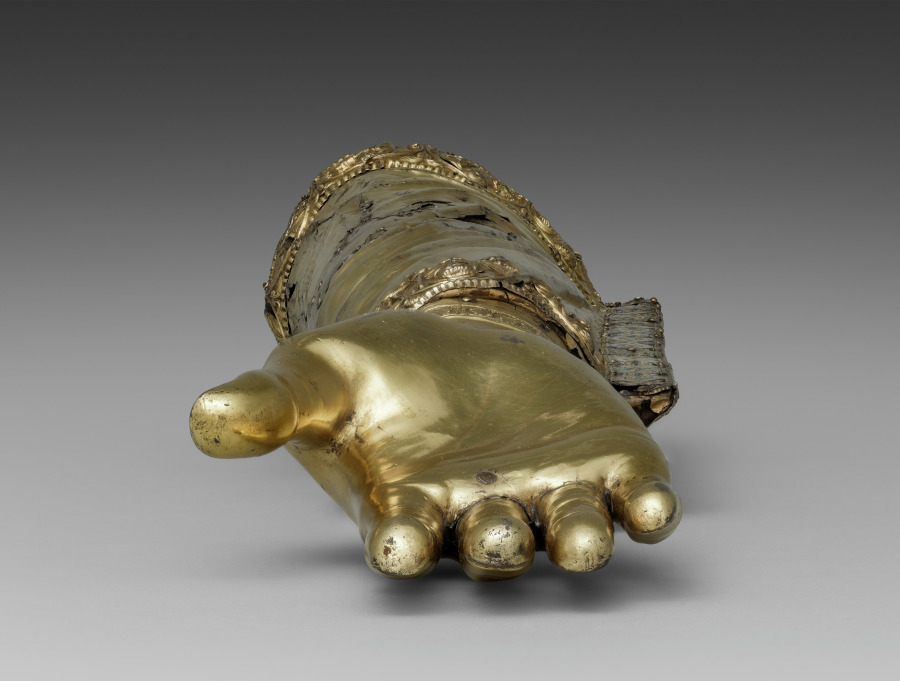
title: Arm Reliquary of the Apostles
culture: Germany, Lower Saxony, Hildesheim, Romanesque period, late 12th century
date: c. 1190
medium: gilt silver, champlevé enamel, oak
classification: Metalwork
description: Taking the form of a clothed lower arm with an outstretched hand, this reliquary from the Guelph Treasure appropriately enshrines a piece of an unidentified saint’s arm bone. Arm reliquaries like this one served as liturgical props; during religious services and processions, the clergy used them to bless and touch the faithful, thus making the presence of the saint more palpable and immediate. The apostle busts that decorate this arm reliquary seem to indicate that the relic it contains is that of an apostle. Duke Henry the Lion, a major patron of the church of Saint Blaise, is known to have received such relics from the Byzantine emperor Manuel I (1143-1180) upon his return from a pilgrimage to Jerusalem.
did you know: Reliquaries were prized not for the opulence that you see, but for the items that they held. They enshrined items associated with saints, like a piece of clothing they wore or a small portion of their remains. In this case, an arm bone is encased within.